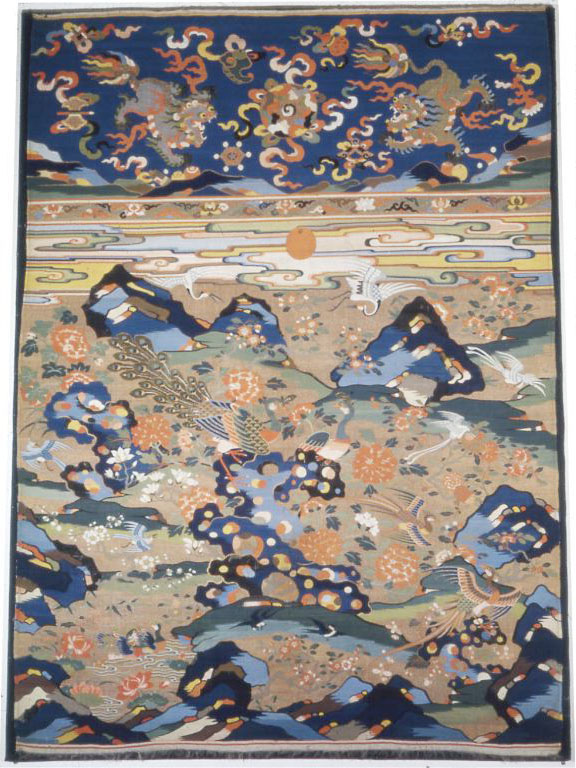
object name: Textile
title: Panel (Furnishing Fabric)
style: ming, qing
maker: China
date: Late–Ming dynasty (1368–1644)/Qing dynasty (1644–1911), 1650/1700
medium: Silk, gold-leaf-over-lacquered-paper-strip-wrapped silk, and peacock-feather-strip-wrapped silk, slit tapestry weave with interlaced outlining wefts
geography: China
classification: textile; weaving; furnishing textile